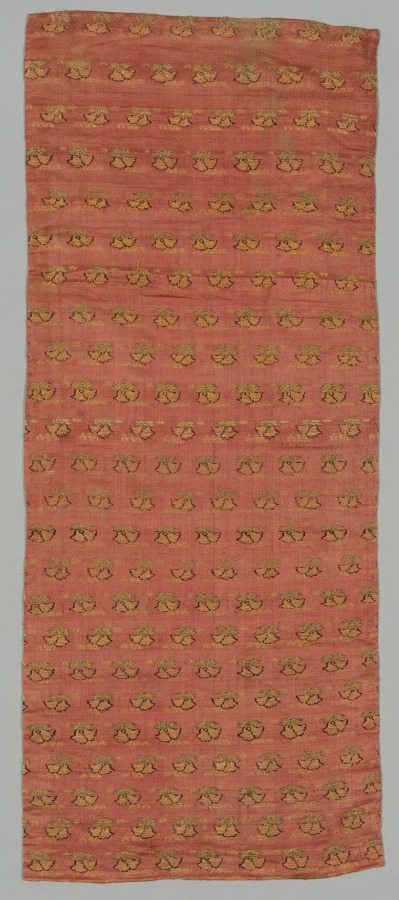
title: Brocade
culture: India, Gulbarga, 18th-19th century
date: 1700s - 1800s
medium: brocade, "himru"; silk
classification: Textile